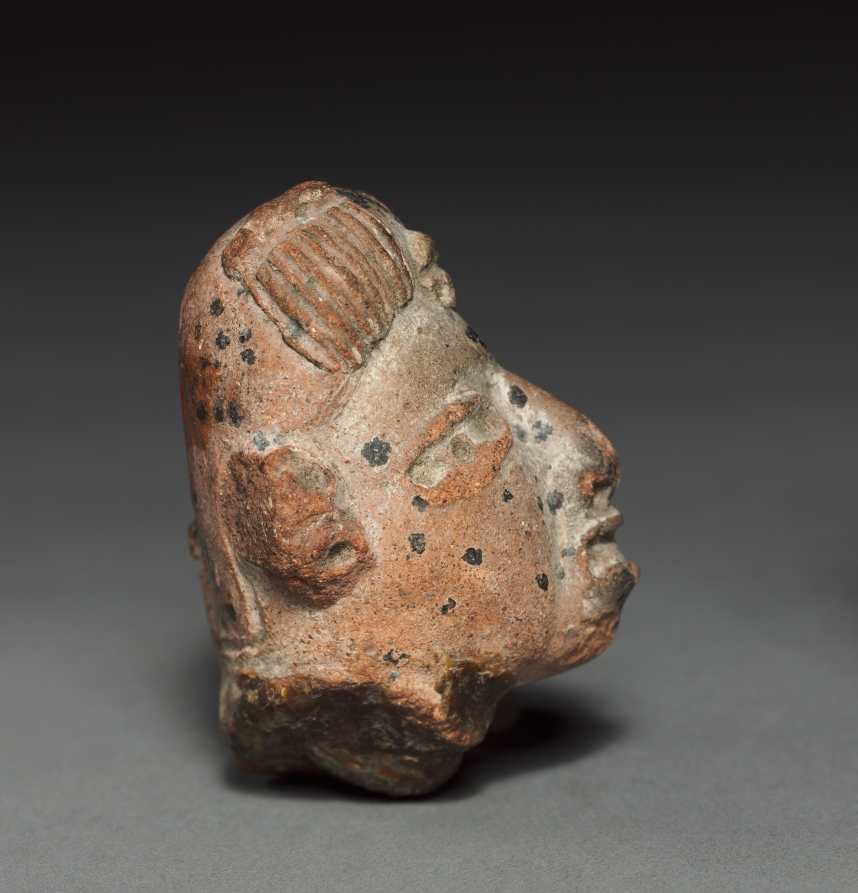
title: Figurine Head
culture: Mexico or Central America, Maya(?)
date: 100 BCE–300 CE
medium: pottery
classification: Sculpture